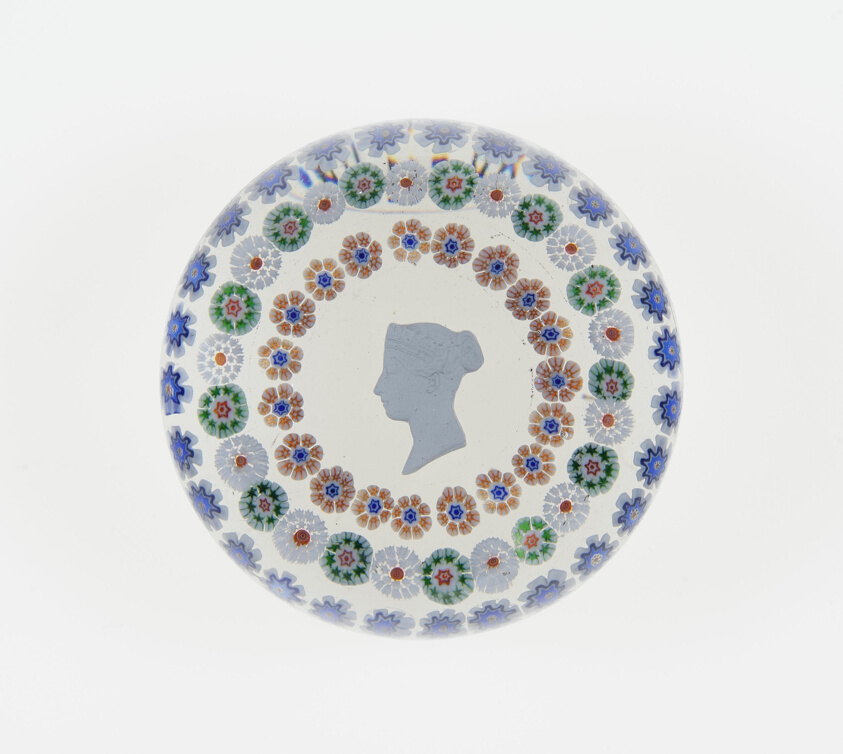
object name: Glass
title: Paperweight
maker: Baccarat Glassworks (Cristalleries de Baccarat); Lorraine, France, founded 1764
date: Mid 19th century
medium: Glass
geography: Baccarat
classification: paperweight; glass